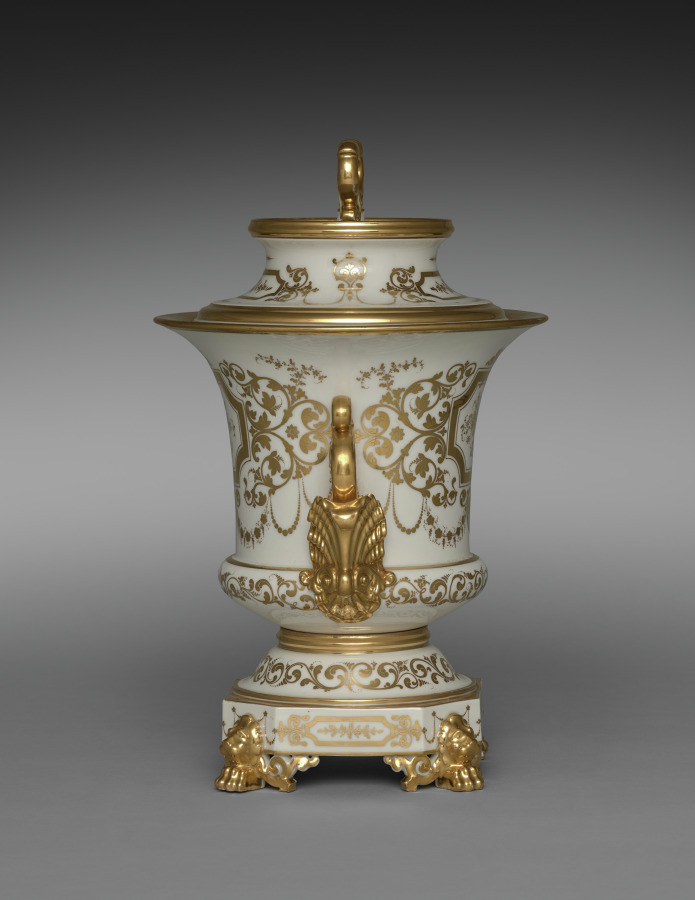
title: Covered Ice Cream Pail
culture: France, Paris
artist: Factory of Jacob-Petit (French, 1830–1865)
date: c. 1840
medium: gilt porcelain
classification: Ceramic